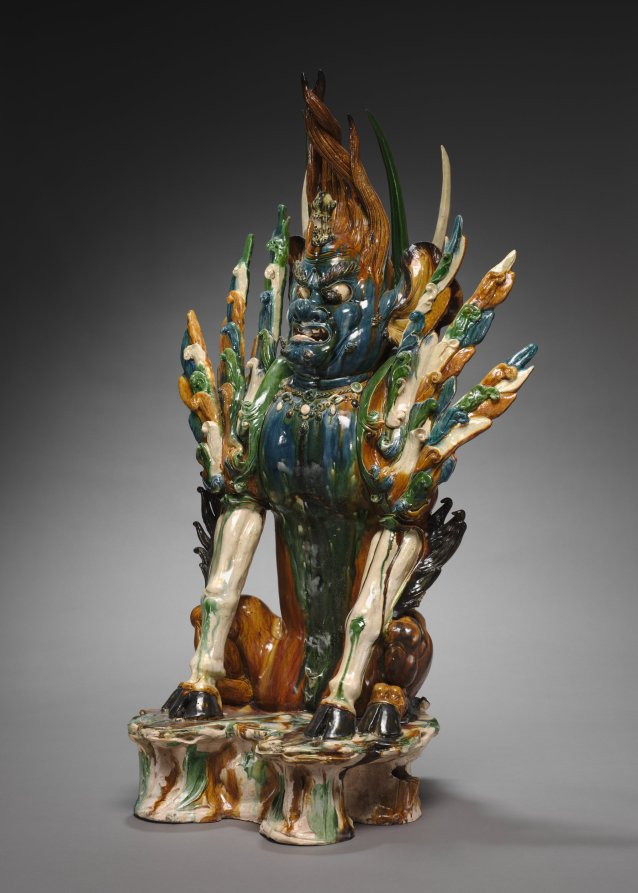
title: Tomb Guardian with Human Face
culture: China, probably Shaanxi province, Xi'an, Tang dynasty (618-907)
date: early 700s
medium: glazed earthenware, sancai (three-color) ware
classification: Ceramic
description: With their fierce expressions and exaggerated physical features, these two fantastic guardian creatures were intended to guard the entrance to a tomb, warding off evil as well as keeping the soul of the deceased from wandering. Known as "earth spirits" or qitou, this one sports a human face with huge protruding ears and a short horn surrounded by fiery, twisting hair; the other has an animal face and a pair of antlers growing above its eyebrows. Their many elongated spikes heighten the fearful intensity. Before tomb sculptures were placed in the tomb, they were carried through the streets in a funerary procession. Funerary gifts provided the deceased with means for the afterlife. They were also an expression of filial piety and demonstrated the wealth and power of the descendants.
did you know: Cobalt blue glaze used on the head and chest was imported from the Middle East.